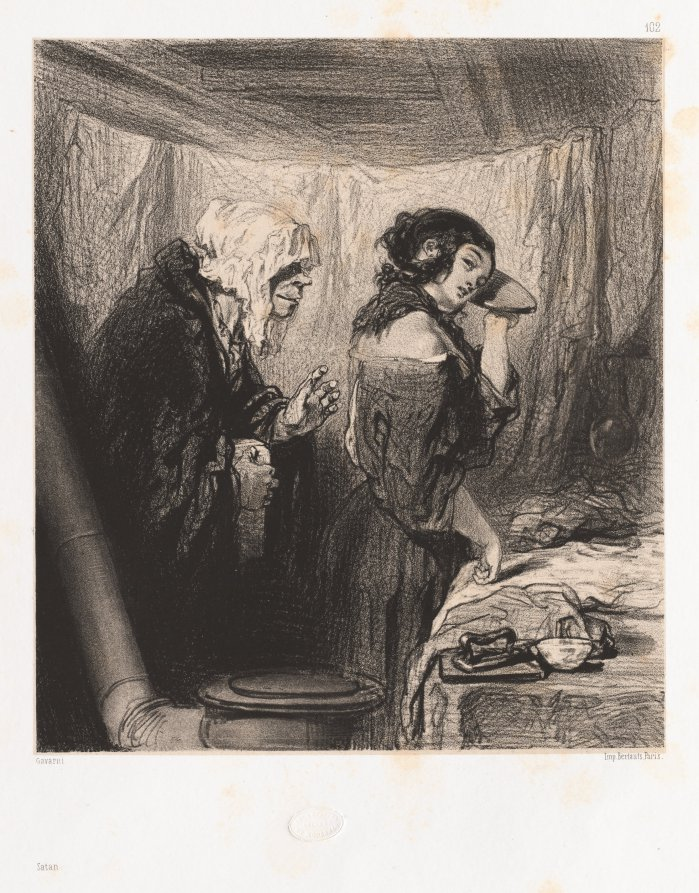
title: Satan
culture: France, 19th century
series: Ancient and Modern Artists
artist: Paul Gavarni (French, 1804–1866)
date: c.1848–62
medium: lithograph on chine collé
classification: Print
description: As the illustrated press proliferated in France during the 1800s, the caricatures published within such newspapers and magazines were sometimes censored. Paul Gavarni was one of numerous artists at this time who used imagery of laundresses as a means of social critique. Here, a young woman’s blouse falls from her shoulder, suggesting her loose morals. She pauses from ironing to listen as a procuress—a woman who lures girls into sex work—approaches her. The print’s title alludes to the woman’s motives and the precariousness of virtue. Gavarni was among Edgar Degas’s favorite artists, and Degas built a substantial collection of the earlier artist’s prints.